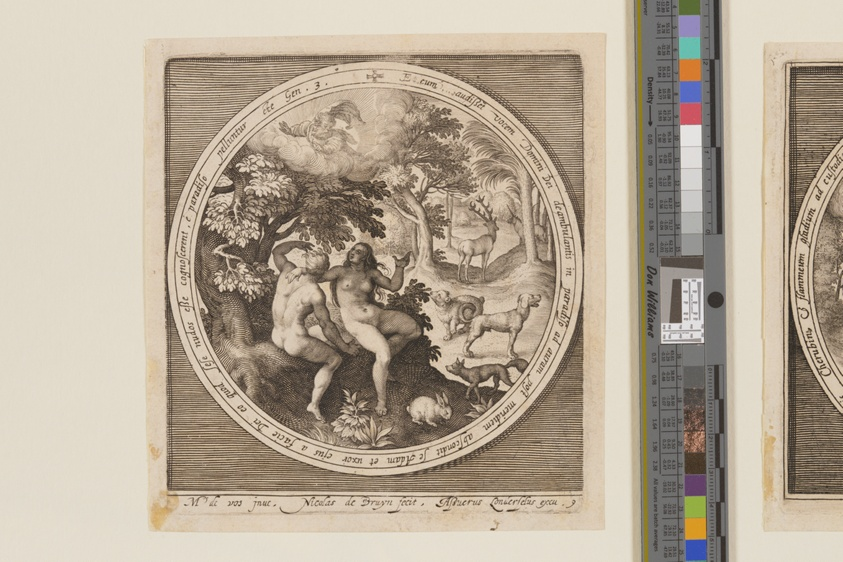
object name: Print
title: Adam and Eve hiding from the Lord, from The Creation to the Expulsion from Paradise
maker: Nicolaes de Bruyn (Flemish, 1571–1656); after Maarten de Vos (Flemish, 1532–1603)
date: c. 1610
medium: Engraving on ivory laid paper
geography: Flanders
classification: engraving; paper; print; prints and drawing